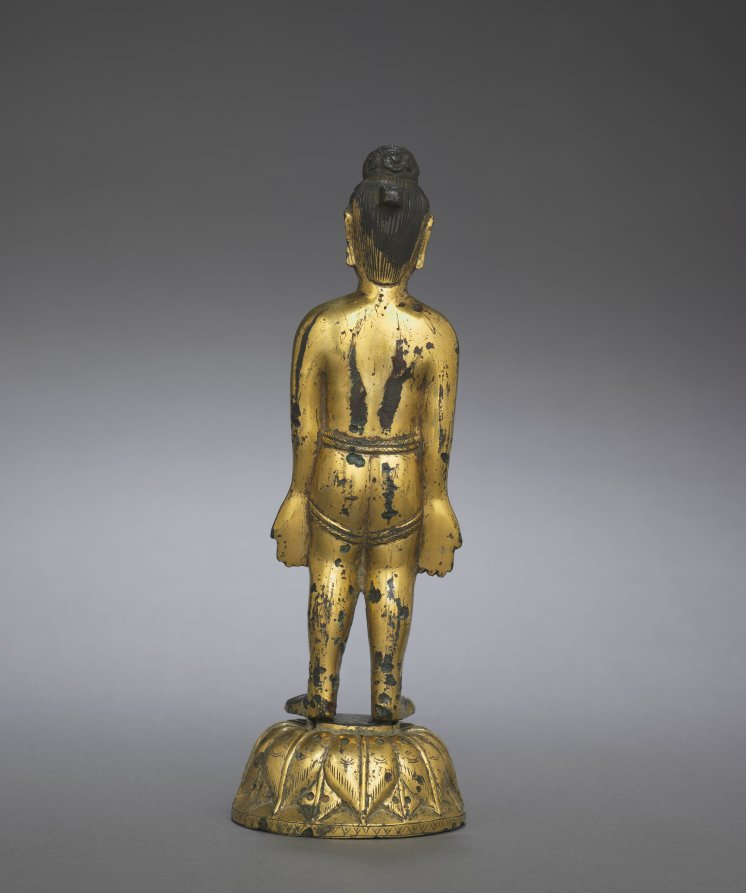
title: The New-born Buddha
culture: China, Northern Wei dynasty (386-534)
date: 400s CE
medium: gilt bronze with inlays of blue glass and turquoise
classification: Sculpture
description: This image of the newborn Buddha is rare and unusual. The common type represents him taking seven steps while proclaiming "I am supreme in the Universe." Here, he is represented as being bathed by the nine Nagas, with both hands down.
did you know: The tang on the back of the Buddha's head shows that it originally had a halo.